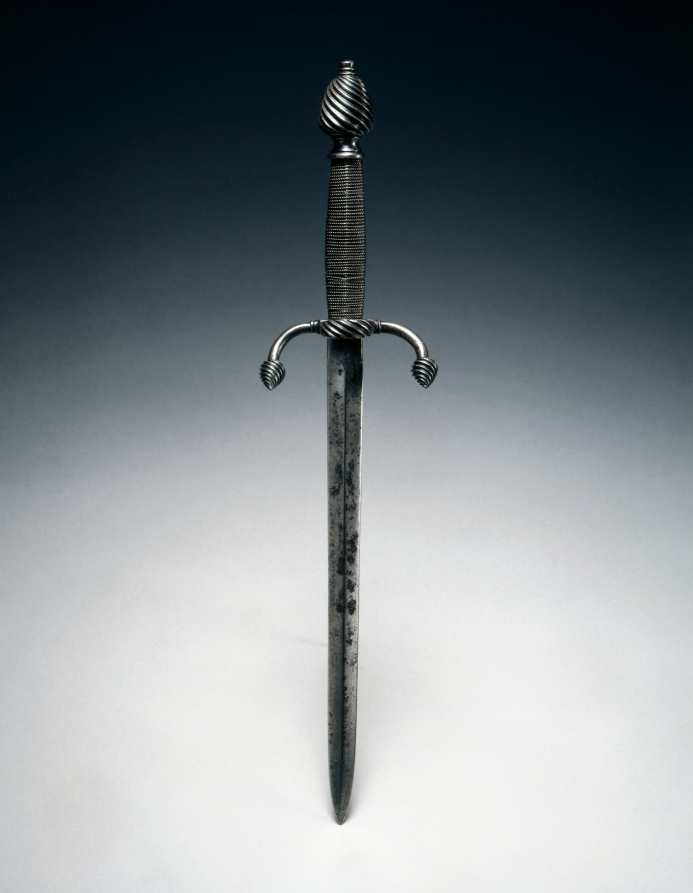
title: Parrying Dagger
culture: Germany, early 17th Century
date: c. 1600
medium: steel, wire grip with arched quillions and side ring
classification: Arms and Armor